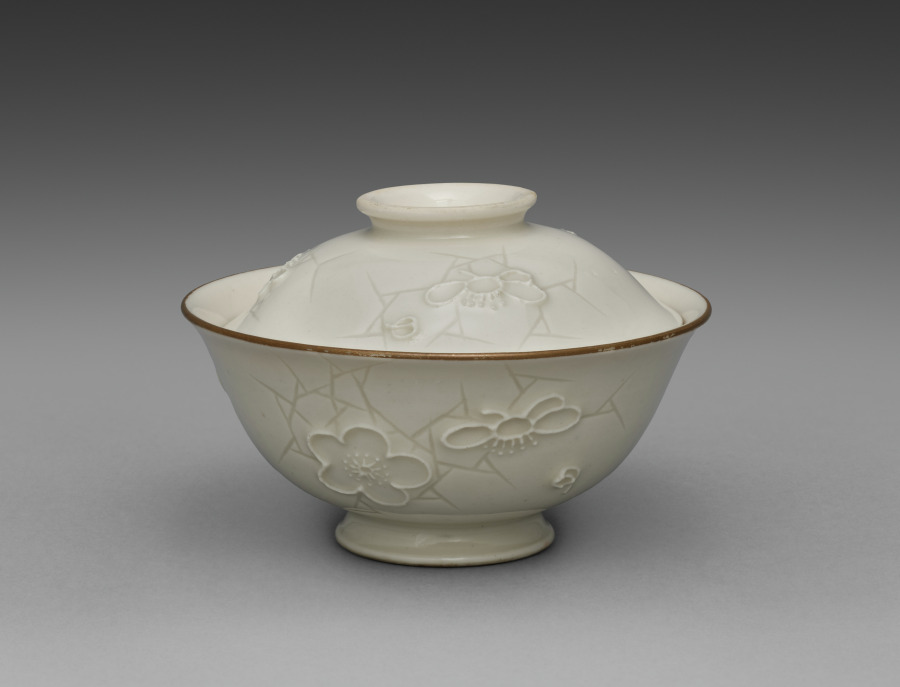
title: Covered Bowl from Dining Set with Plum Blossoms and Cracked-Ice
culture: Japan, Meiji period (1868–1912)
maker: Seifū Yohei II (Japanese, 1844–1878)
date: c. 1875–78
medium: Porcelain with molded designs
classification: Ceramic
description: Each item in this set has a delicate low-relief design of flowering plum branches over scattered, intersecting lines meant to resemble the cracked-ice surface of a frozen body of water and is signed on the base in gold pigment. While Yohei II produced many fine works in underglaze blue, like those produced by Kiyomizu Shichibei, he also made works in quite different styles later in his career, from the early 1870 s. In 1873, he was appointed purveyor to the Industrial Center of Kyoto Prefecture, a designation associated with Kyoto’s efforts to reach an international market through the port of Kobe; and from 1875 until his death, he was involved in national-level projects to present Japanese ceramics across the world. It was during this period that Yohei III was apprenticed to Yohei II, and it has been suggested that this set may in fact be an early example of Yohei III’s work, which he signed with his teacher’s name. Decorated with flowers resembling Japanese textile motifs, the set calls to mind the design of Yohei II’s pair of vases with plum blossoms in the Victoria and Albert Museum. Here, the elaborate trees created for a formal public exhibition setting have been translated into the approachable blossoms of the genteel domestic environment. While the designs are consistent across the pieces, each raised flower petal and pistil and each incised line in the ice was done by hand, so the cups, bowls, and dishes are similar yet unique. The bottoms of two boxes once identified the set’s owner, but the information has been deliberately obscured with black ink. However, inscriptions still visible appear to indicate two occasions, once at the end of July 1886 , and once again in June 1916 , when parts of the set were requested from Hokura in Niigata Prefecture. The location corresponds to a neighborhood in the present-day city of Jōetsu. The surname Tsuji 辻 also appears on a paper tag affixed to one of the box cloths. Future research may possibly reveal more about their provenance. A vase by Yohei III in a private collection combines the formal grandeur of the Yohei II vases in the Victoria and Albert Museum with the gentler design of this dining set, placing flowering plum trees against soft, scalloped-edge clouds resembling those in golden screens.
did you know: The dining wares have a creamy white coloration that the four boxes containing them identify as Korean in style.